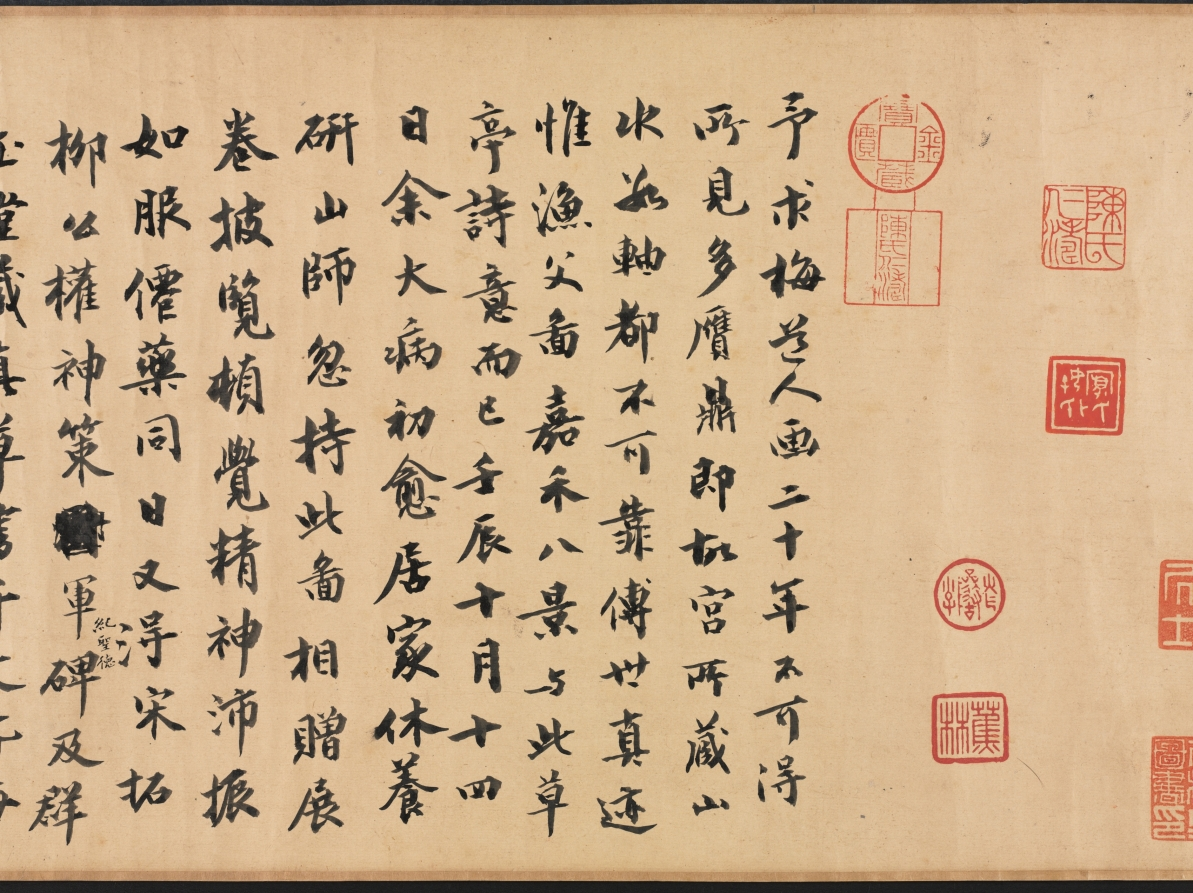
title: Poetic Feeling in a Thatched Pavilion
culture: China, Yuan dynasty (1271-1368)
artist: Wu Zhen (Chinese, 1280–1354)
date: 1347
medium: handscroll; ink on paper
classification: Painting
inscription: 依村構草亭，端方意匠宏。 林深禽鳥樂，塵遠竹松輕。 泉石俱延賞，琴書悅性情。 何當謝凡近，任適慰平生。 至正七年丁亥冬十月，為元澤戲作草亭詩意。梅沙彌書 [印]楳華盦; 嘉興吳鎮仲圭書畫記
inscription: 我愛梅花翁，巨老傳心印。 脩此水墨缘，種種得蒼潤。 樹石墮筆鋒，造化不能吝。 而今橡林下，我願執掃汛。 後學沈周 [印]启南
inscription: Colophon by Chen Rentao (1952): 予求梅道人畫二十年不可得。所見多膺鼎，即故宮所藏山水數軸都不可靠。傳世真迹，惟《漁父圖》、《嘉禾八景》與此《草亭詩意》而已。壬辰十月十四日余大病初愈，居家休養，研山師忽持此圖相贈。展卷披覽，頓覺精神沛振，如服僊藥。同日又得宋拓柳公權《神策軍紀聖德碑》，及群玉堂藏《真草書千(字)文》，皆海內孤本。一日得數寶，欣喜何如，書以志幸。 陳仁濤識 [印]陳氏仁濤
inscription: Colophon by Chen Rentao: 此圖作於至正七年丁亥，時年六十八，盖其晚年神品也。 濤又識 [印]陳仁濤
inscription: Title on frontispiece by Li Dongyang 李東陽 (1447-1516).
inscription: 33 additional seals: 1 seal of Li Chao-heng 李肇亨 (1592-1664)：檇李李肇亨書畫記; 9 seals of Liang Qingbiao 梁清標 (1620-1691): 蒼巖子、蕉林、蕉林梁氏書畫之印、蕉林秘玩、蕉林書屋、蕉林玉立氏圖書、棠邨 (appears twice)、棠邨審定; 1 seal of Wang Yirong (1845-1900): 懿榮; 3 seal of Li Yanshan (1898-1961): 雙銕笛樓 (appears twice)、硯山心賞; 12 seals of Chen Rentao 陳仁濤（1906-1968）：陳氏仁濤、陳仁濤珍藏印、金匱寶藏·陳氏仁濤 (appears three times)、金匱秘笈、金匱室、金匱室精鑒璽 (appears twice)、金匱室主、金匱神品、仁濤奇緣; 1 seal: 崐溟居士; 1 seal: 林止在㭯生圖書印; 3 seals unidentified.